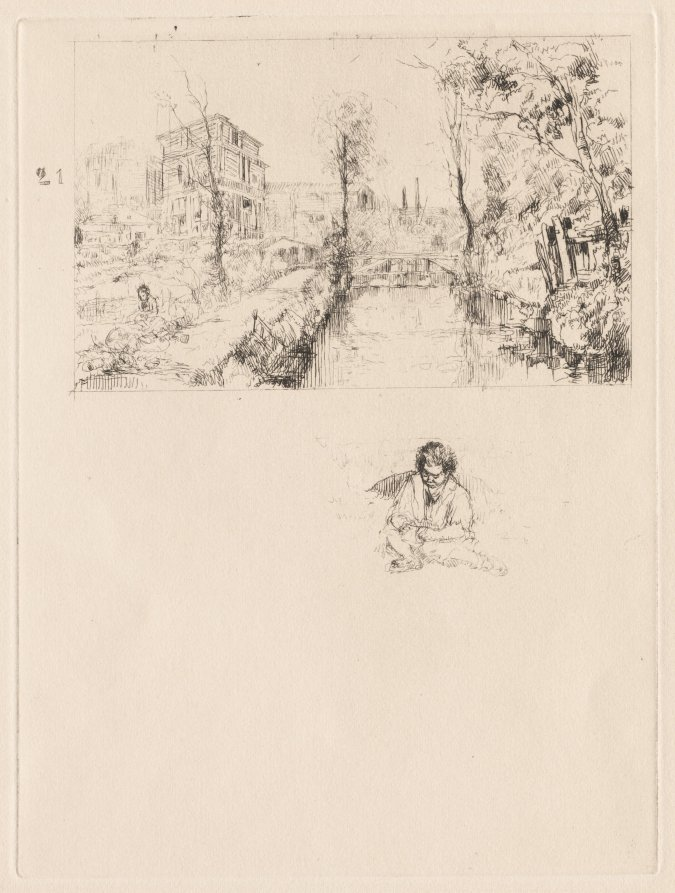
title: Landscape with Bridge and Child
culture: France, 20th century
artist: Auguste Brouet (French, 1872–1941)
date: c. 1902–41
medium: etching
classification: Print